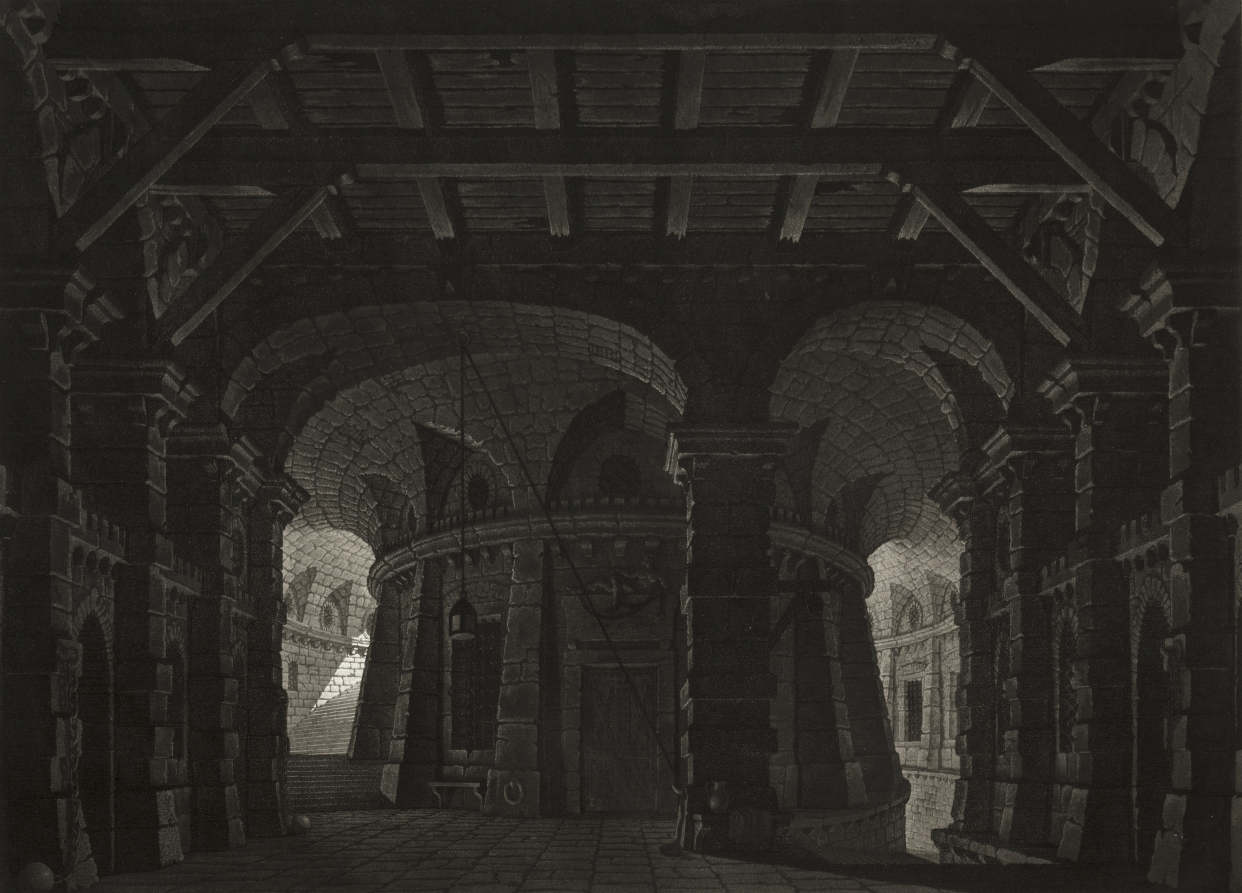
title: Subterranean Jail for the Stage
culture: Germany, 18th century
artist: Abel Schlicht (German, 1754–1826)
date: 1788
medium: etching and aquatint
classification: Print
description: Trained as an architect, Abel Schlicht also designed stage sets for the Mannheim National Theater. An important forum for German cultural identity, the theater was one of the first companies to produce exclusively German-language plays, including those by beloved playwright Friedrich Schiller. Prisons were an especially popular drama subject in the 1700s, and sets would have featured in multiple productions. Here, Schlicht employed aquatint to render the gloomy space of one of his prison scenes. This technique enabled the artist to create the range of tones used to illuminate the background and plunge the foreground into darkness.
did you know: Since none of his stage sets survive, Abel Schlicht’s prints serve as records of his lost designs.